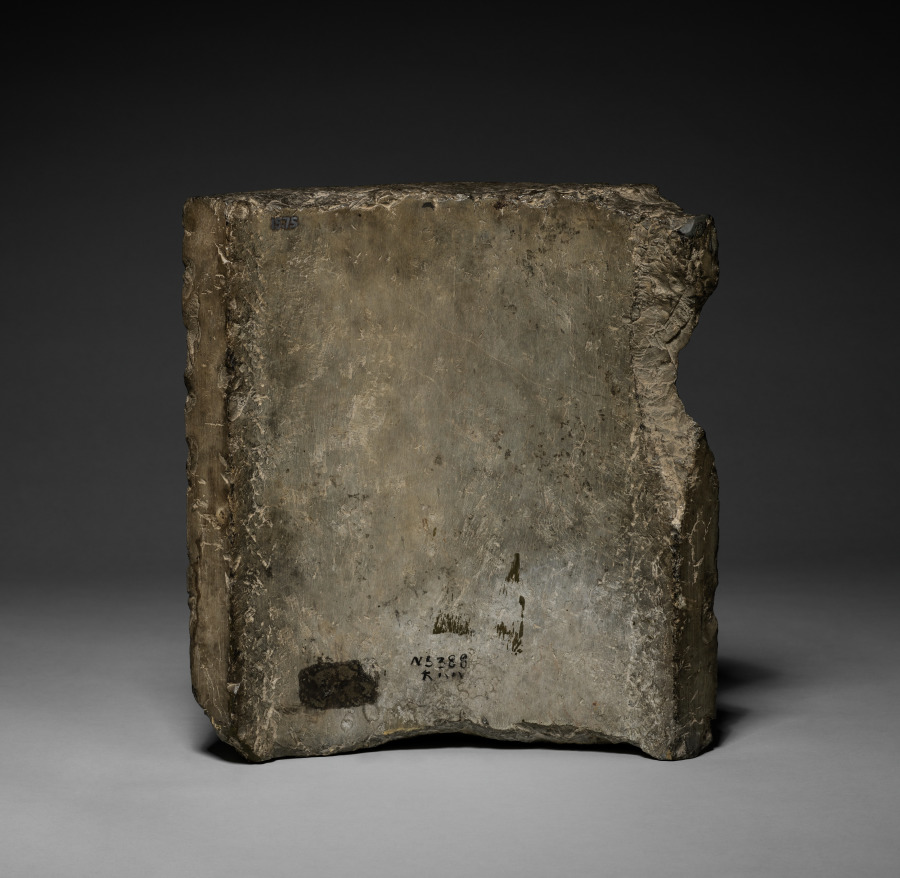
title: Corner Stone with Two Eleven-Headed Guanyin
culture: China, Tang dynasty (618-907)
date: c. 700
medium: stone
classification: Sculpture